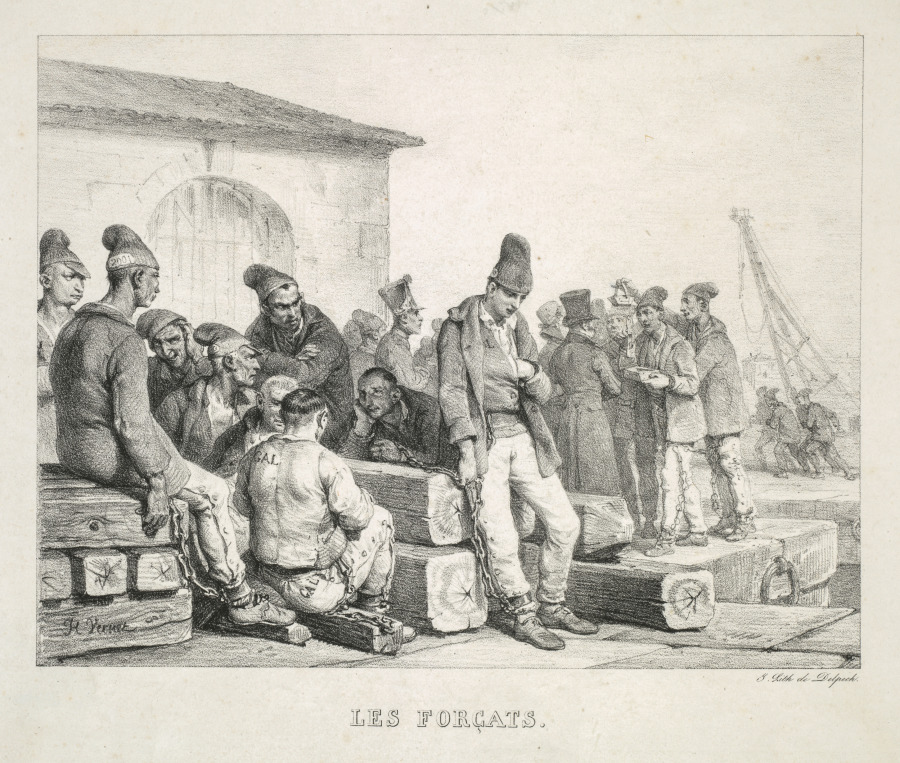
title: The Convicts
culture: France, 19th century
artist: Horace Vernet (French, 1789–1863)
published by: Delpech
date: 1826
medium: lithograph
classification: Print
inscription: Lower right corner, print: G. Lith. De Delpach